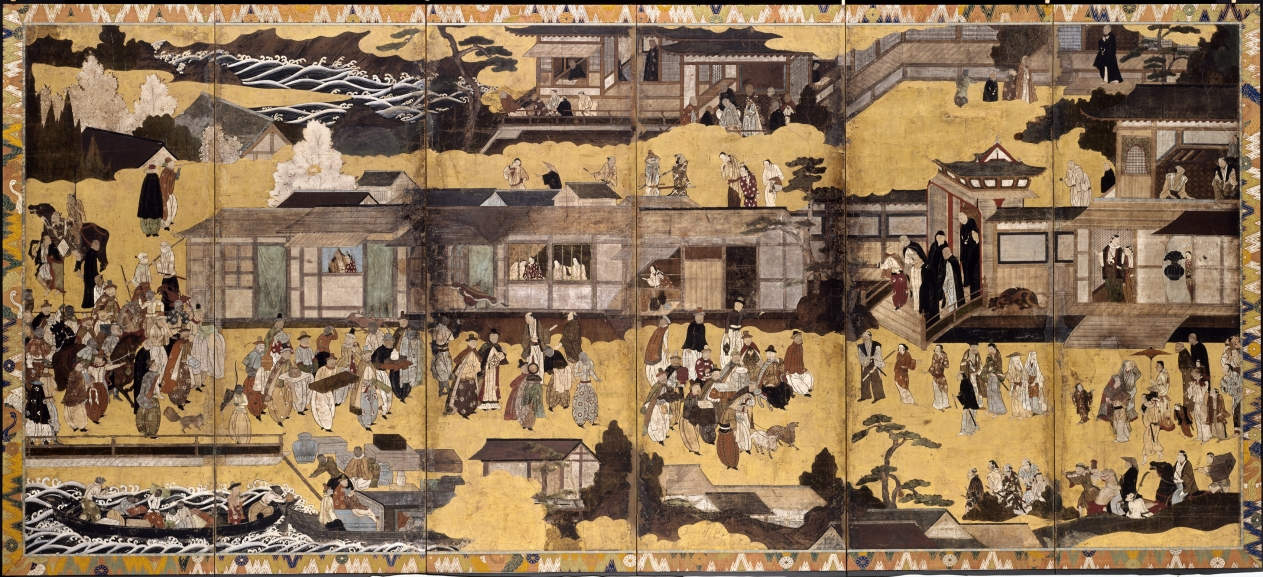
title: Arrival of the "Southern Barbarians"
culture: Japan, Momoyama period (1573–1615)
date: c. 1600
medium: One of a pair of six-panel folding screens; ink, color, and gold on paper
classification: Painting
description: This screen and its corresponding screen show Portuguese merchants arriving in Japan, having crossed the oceans in their large ship with a multinational crew. The Portuguese were known in Japan as the “Southern Barbarians” because they arrived from the south and their customs and manners were unfamiliar to the Japanese, who had not encountered anyone from Europe until their first appearance in 1543. In 1639, the Portuguese were forced out of Japan, mainly owing to internal difficulties caused by their Catholic missionaries, but they were a major conduit for both objects and ideas from Europe for nearly 100 years.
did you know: Europeans were called "Southern Barbarians" because their ships arrived in Japan from the south.